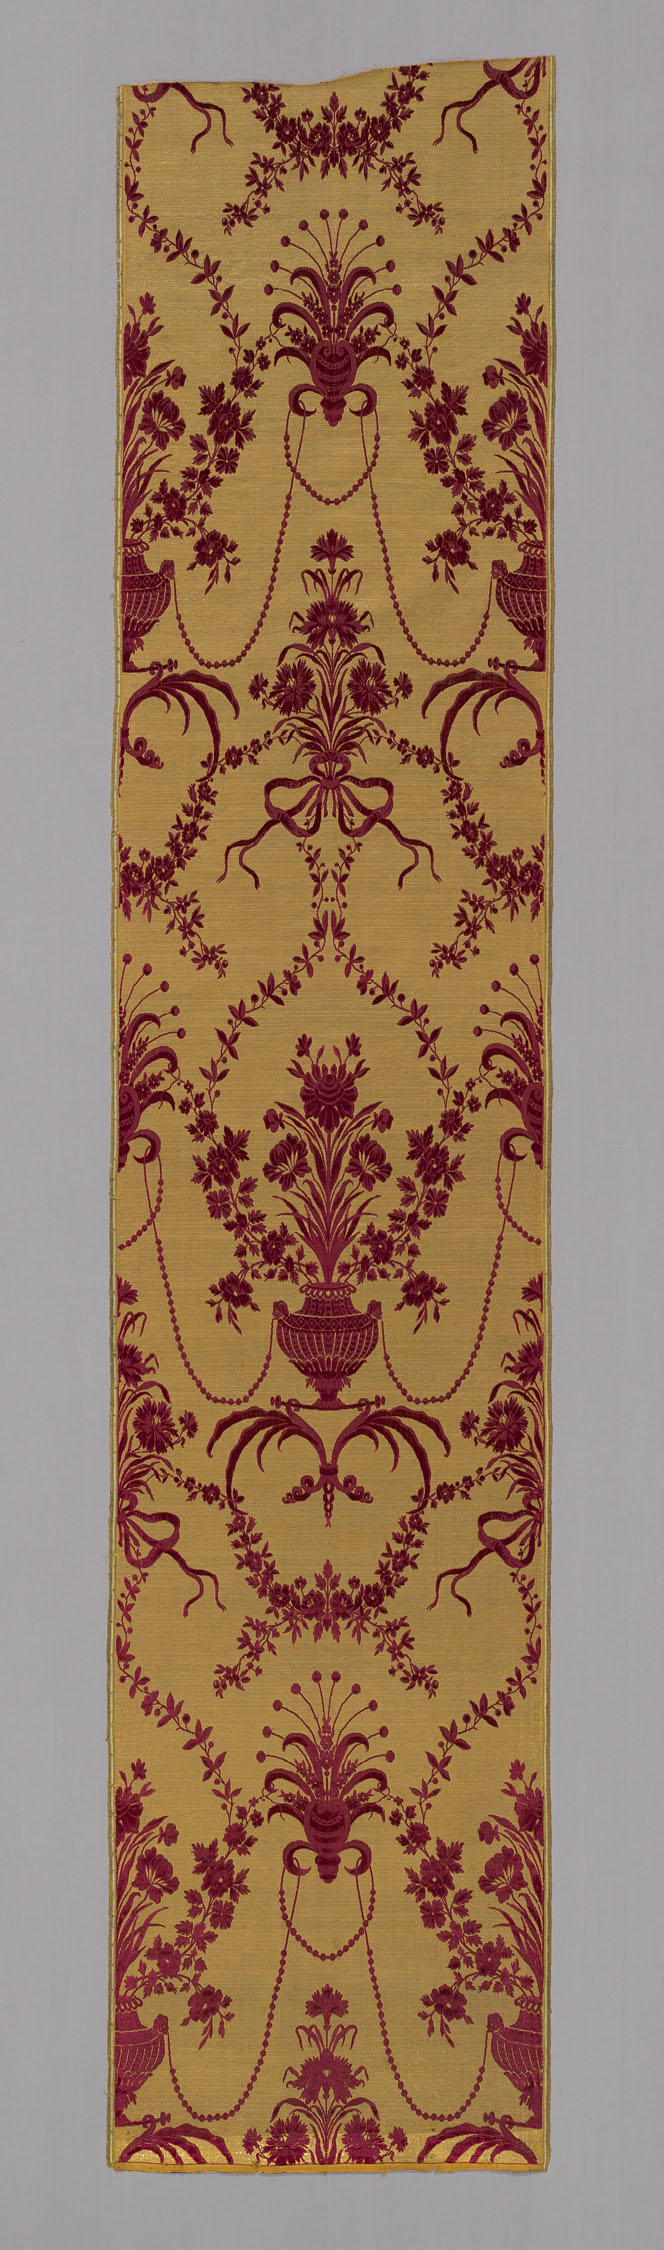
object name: Textile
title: Panel (Formerly Used as a Wallcovering)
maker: Italy, Genoa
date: 1775/85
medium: Silk and gilt-metal-strip, twill weave with supplementary patterning wefts and supplementary pile warps forming cut and uncut, voided velvet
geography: Italy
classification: textile; weaving - velvet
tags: flowers, swags, urns